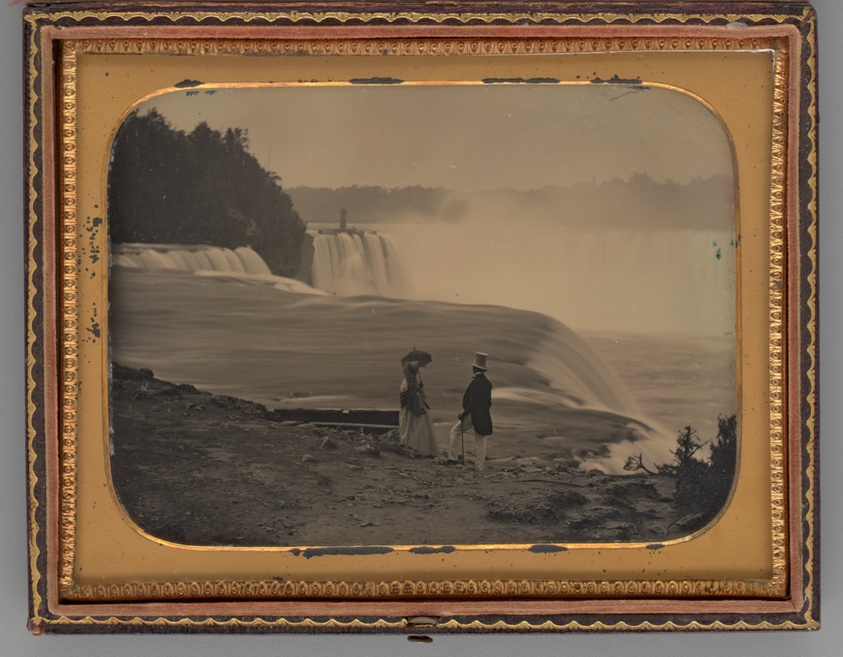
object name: Photograph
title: Untitled (Couple Standing next to Niagara Falls)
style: 19th century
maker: Unknown maker; American, 19th century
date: 1853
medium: Daguerreotype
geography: United States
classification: photography; daguerreotype; portrait; portrait; photograph; photographic process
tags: lundberg collection, couples, Niagara Falls, people, portrait, portraits: multiple subjects